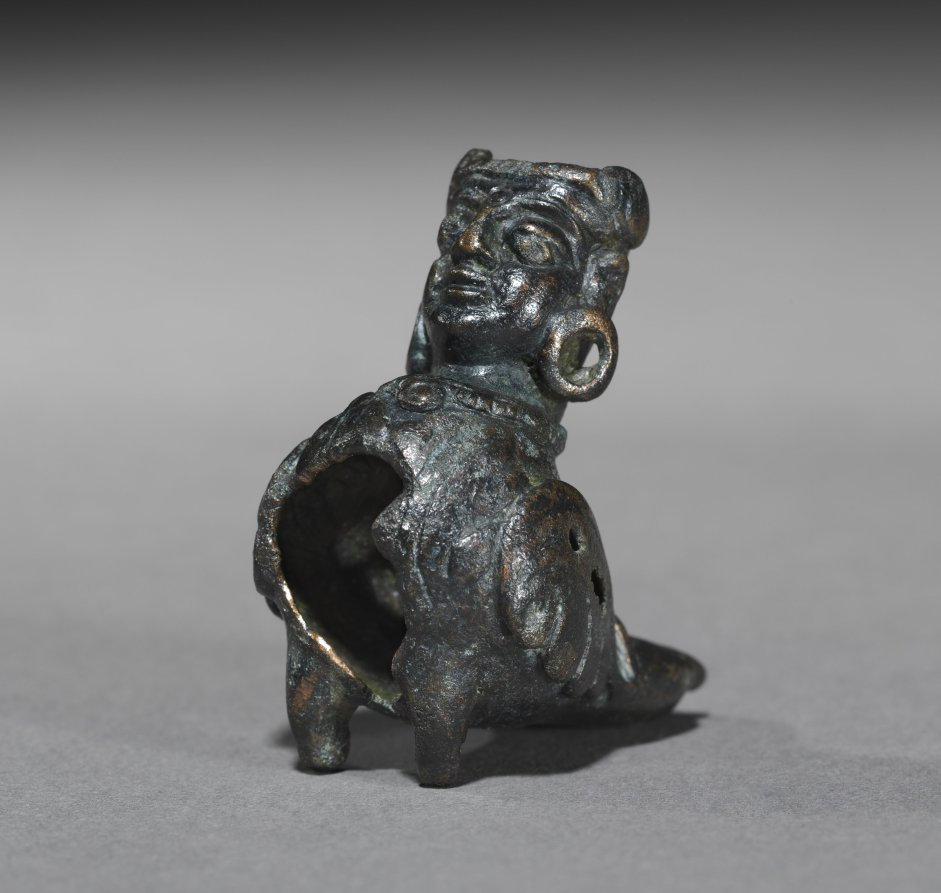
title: Harpy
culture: Iran, Seljuk Period, 11th-12th Century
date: 1000s-1100s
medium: bronze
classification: Jewelry